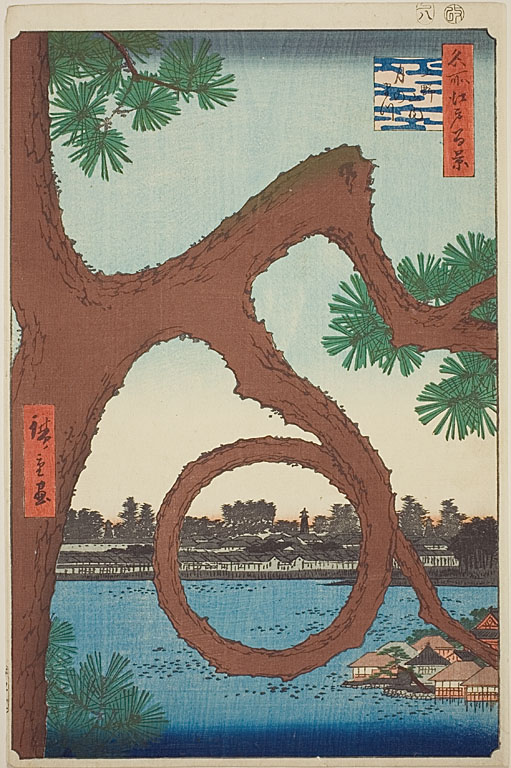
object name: Print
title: The Moon Pine on the Temple Grounds at Ueno (Ueno sannai Tsuki no matsu), from the series “One Hundred Famous Views of Edo (Meisho Edo hyakkei)”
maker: Utagawa Hiroshige (Japanese, 1797-1858)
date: 1857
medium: Color woodblock print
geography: Japan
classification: woodblock print; print; asian art